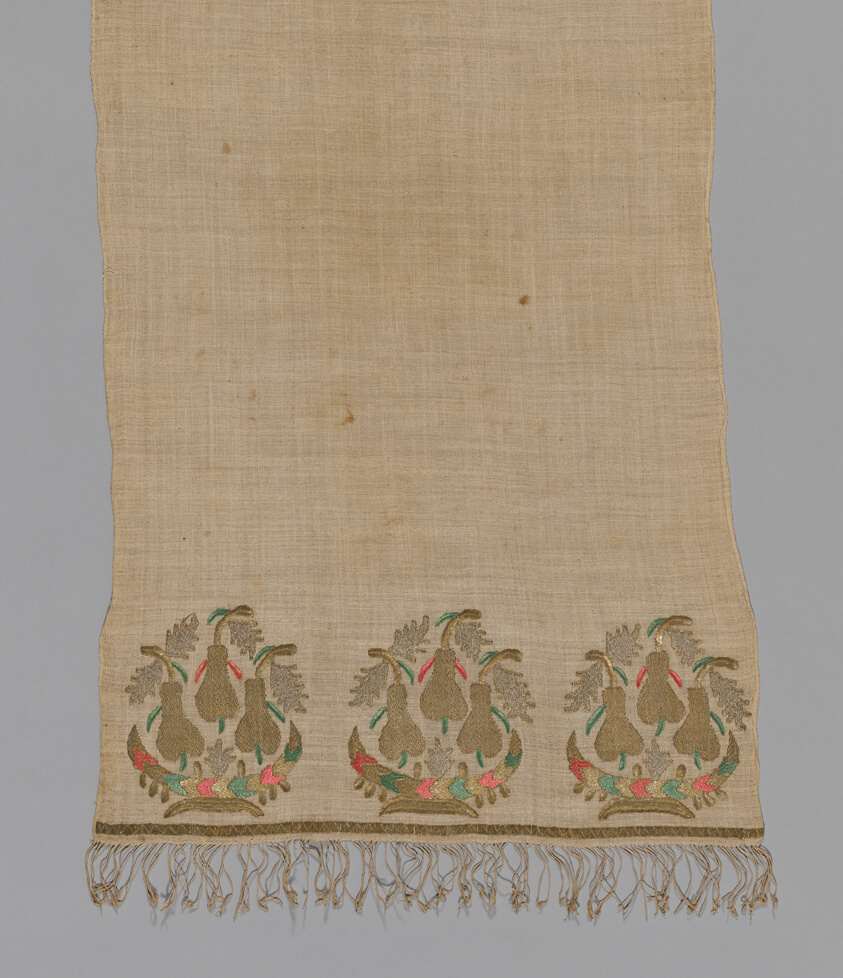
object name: Textile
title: Towel/Napkin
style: turkish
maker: Turkey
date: 1850/1900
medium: Linen, plain weave; embroidered with silk and gilt and silvered-metal-strip-wrapped-silk in darning, fishbone, double running, and turned double running stitches; main warp knotted fringe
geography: Turkey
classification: textile; weaving; needlework (visual works)